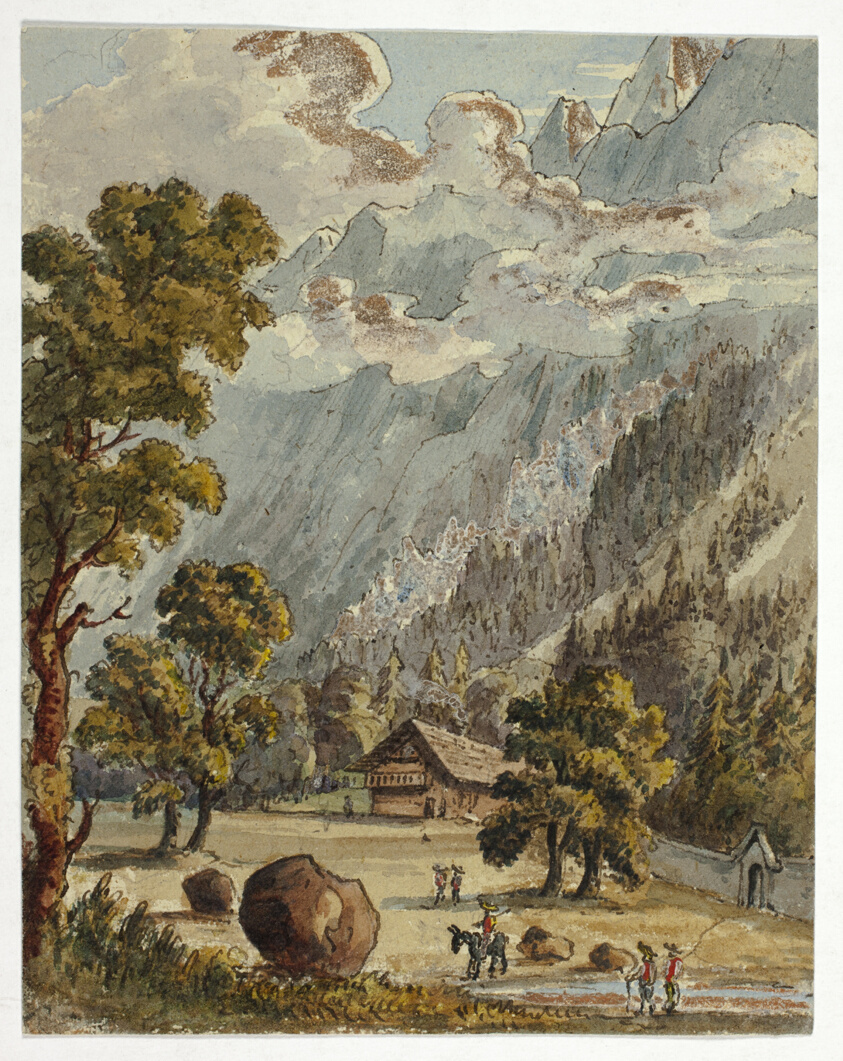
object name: Drawing and Watercolor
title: Chalet and Garden below Alps (recto); Village & Glacier du Boissons, Chamix (verso)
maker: Unknown Artist; British or Swiss, 19th century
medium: Pen and brown ink with brush and watercolor, heightened with lead white, over graphite (recto), and graphite (verso), on ivory wove paper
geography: United Kingdom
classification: watercolor; drawings (visual works); prints and drawing